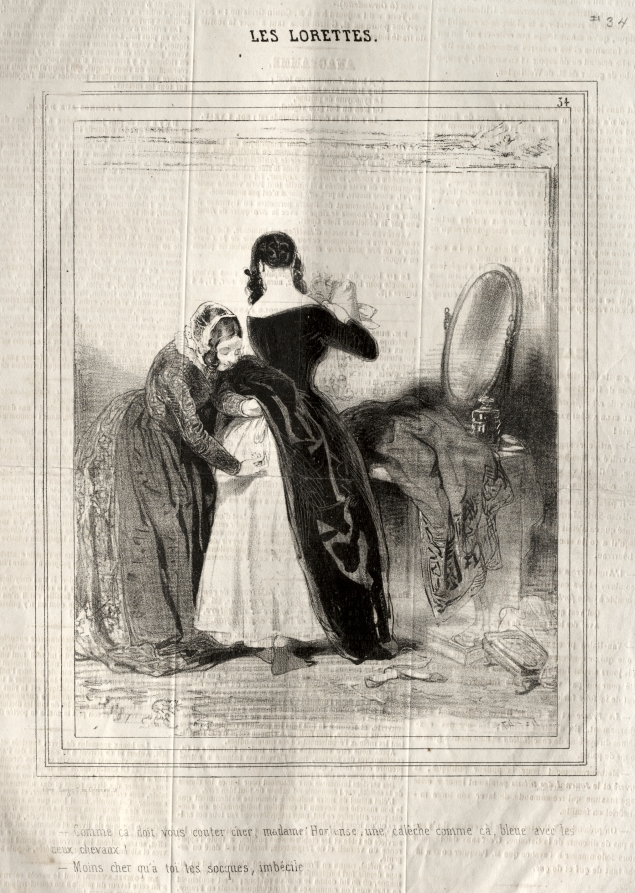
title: Les Lorettes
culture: France, 19th century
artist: Paul Gavarni (French, 1804–1866)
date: 1842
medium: lithograph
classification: Print